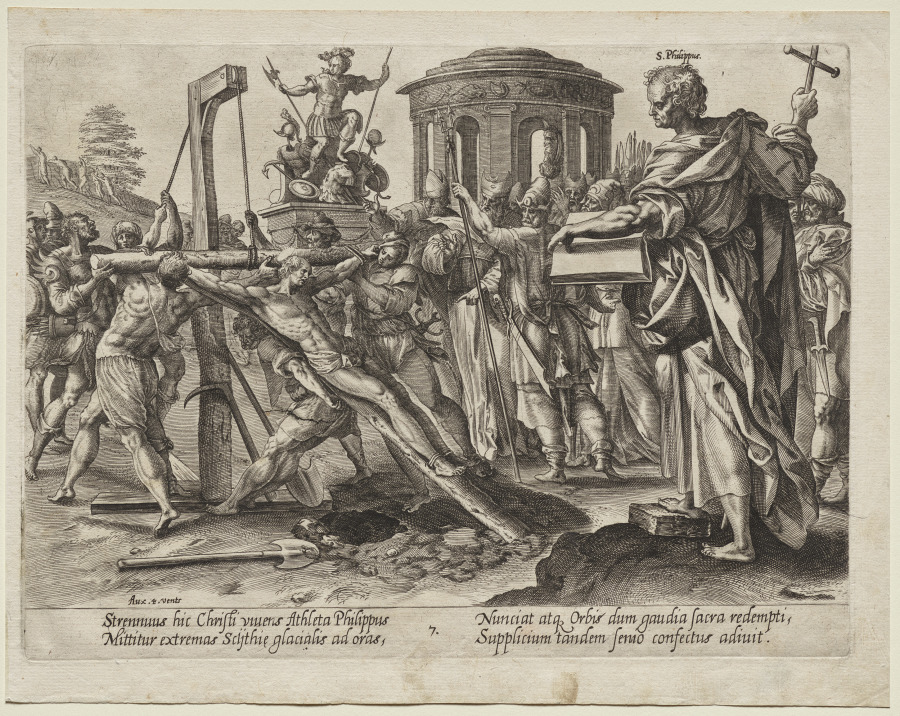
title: St. Philippus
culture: Netherlands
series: Christ, St. Paul, and the Twelve Apostles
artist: Hendrick Goltzius (Dutch, 1558–1617)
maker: after Maarten de Vos (Flemish, 1532–1603)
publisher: Aux Quatre Vents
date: c. 1578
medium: engraving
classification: Print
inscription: Aux.4.vents. bottom right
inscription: Verses in lower margin: Strennuus hic Christi…confectus adiuit.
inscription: In nimbus S. Philippus. Numbered 7.